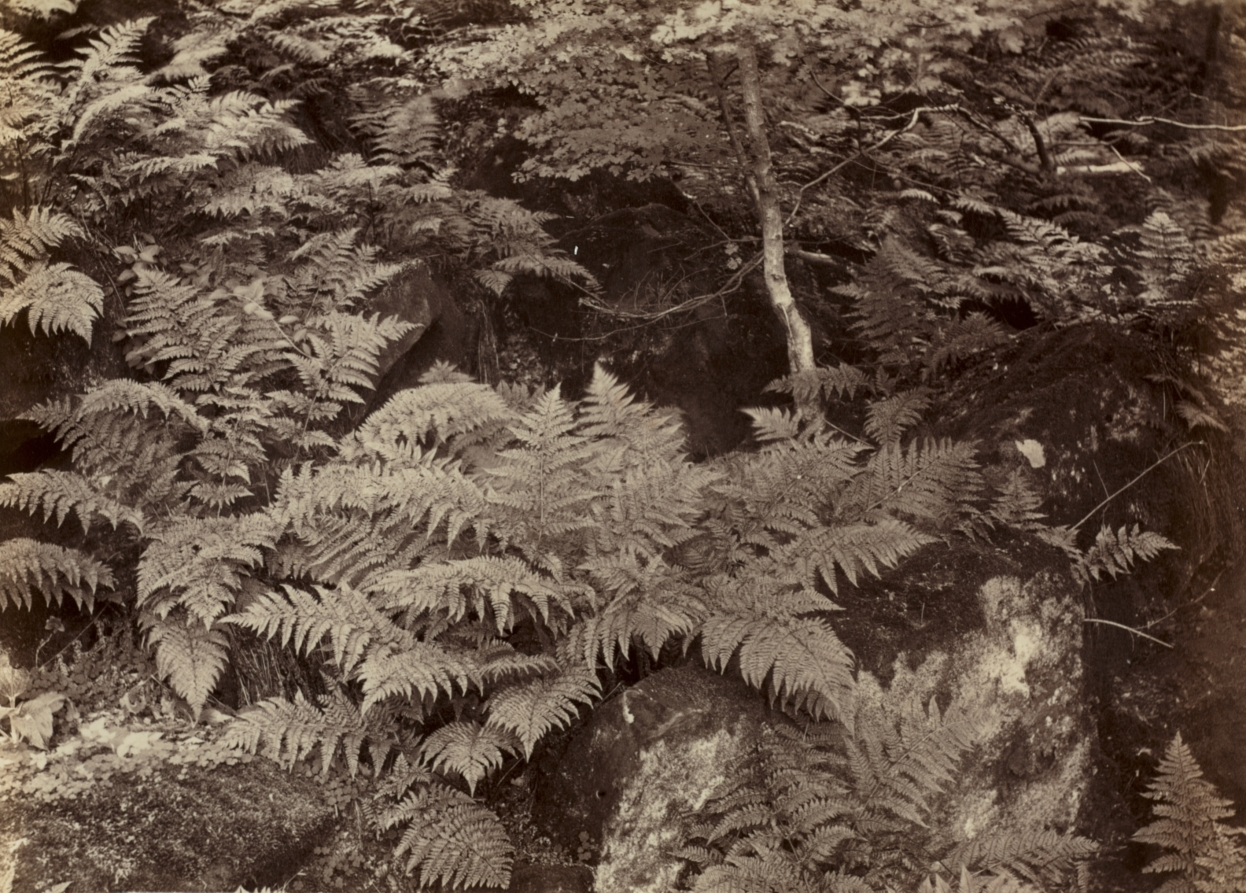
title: Untitled (Fern Study)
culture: England, 19th century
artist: Frank Meadow Sutcliffe (British, 1853–1941)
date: late 1870s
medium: albumen print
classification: Photograph